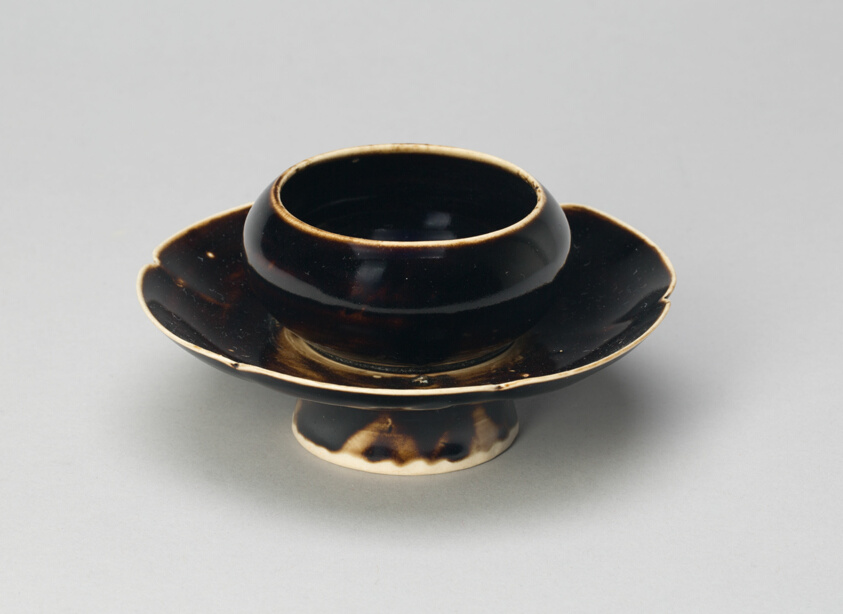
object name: Vessel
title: Cupstand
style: Chinese (culture or style)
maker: China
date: Northern Song dynasty (960–1127), 11th/12th century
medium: Black Ding ware; porcelain with brownish-black (tea dust) glaze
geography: China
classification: stoneware; vessel